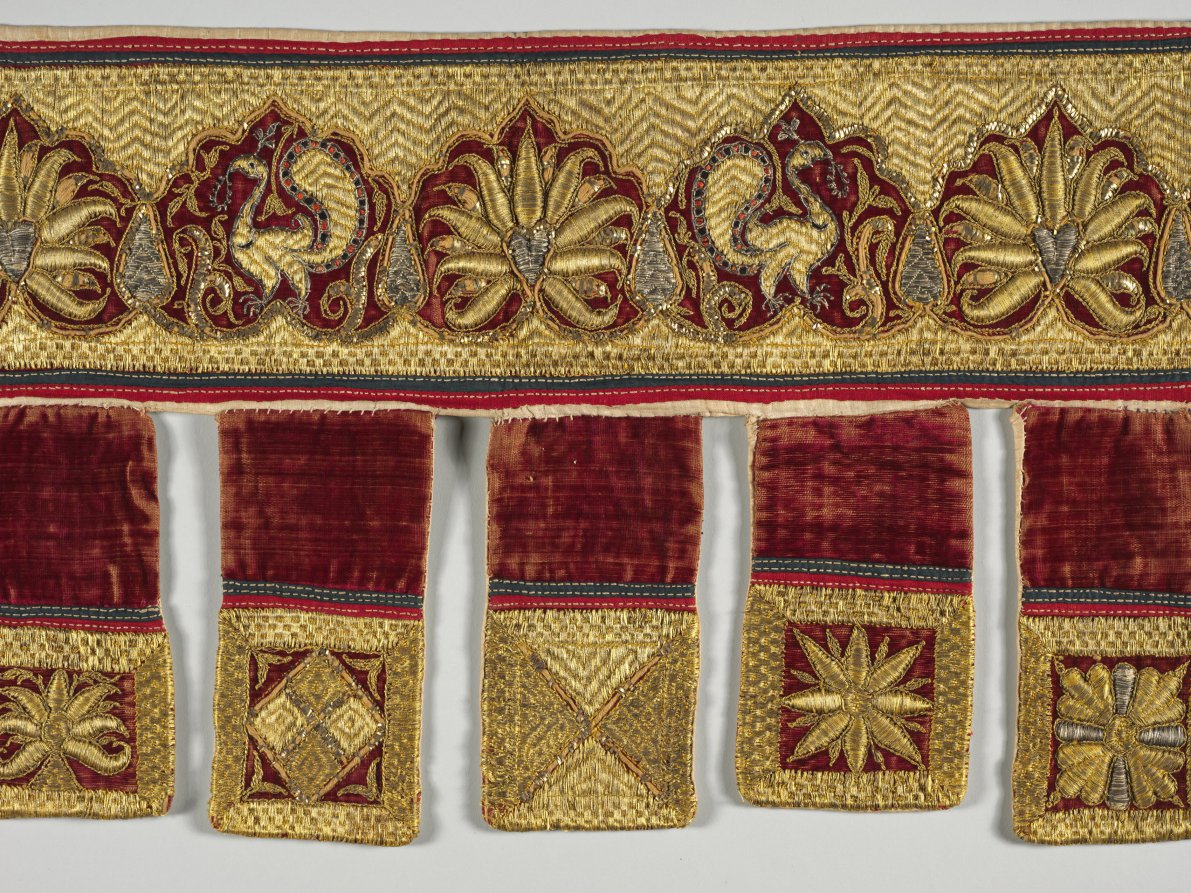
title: Embroidered Door Hanging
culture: India, 18th century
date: 1700s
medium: velvet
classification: Embroidery